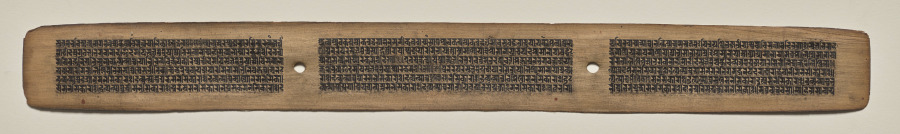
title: Text, Folio 84 (recto), from a Manuscript of the Perfection of Wisdom in Eight Thousand Lines (Ashtasahasrika Prajnaparamita-sutra)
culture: Eastern India, Bihar, Vikramashila Monastery. Painting: Nepal, Kathmandu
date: Sunday, September 14, 1119 (year 239 of the Newar Samvat in the month of Ashvina)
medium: gum tempera and ink on palm leaves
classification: Painting